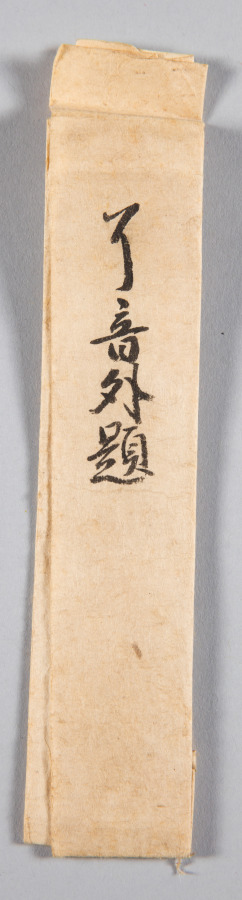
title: Reflections of Priest Foyen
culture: Japan, Muromachi period (1392–1573)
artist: Ikkyū Sōjun (Japanese, 1394–1481)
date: 1400s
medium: hanging scroll, ink on paper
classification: Painting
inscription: signed: "Kido nanasei son, Ikkyūshi Sōjun sho (Written by Ikkyū Sōjun, the seventh generation of Kido)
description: Left by his mother at a small Zen temple in Kyoto at the age of six, Ikkyu later drew on his early studies and experiences for his writings, which focused on his keen interest in the Chinese classics. Poetry in particular was a favorite subject and images from classical poetry or passages from favorite poems or commentaries frequently provided Ikkyu with the core ideas for his own work. A rare example of his calligraphy, this narrow scroll contains a verse in eight phrases, each comprising four characters. The whole verse is organized in three towering lines of brusque, emphatic calligraphy augmented by Ikkyu's signature-the two lines of running script in the lower left corner. The text refers to a passage included in the Chronicle of the Zen Sect that contains a cautionary reminder attributed to the legendary Chinese monk Foyen Qingyuan (1067-1120), long revered in Japan. The initial phrase begins: "Life is a mirage."